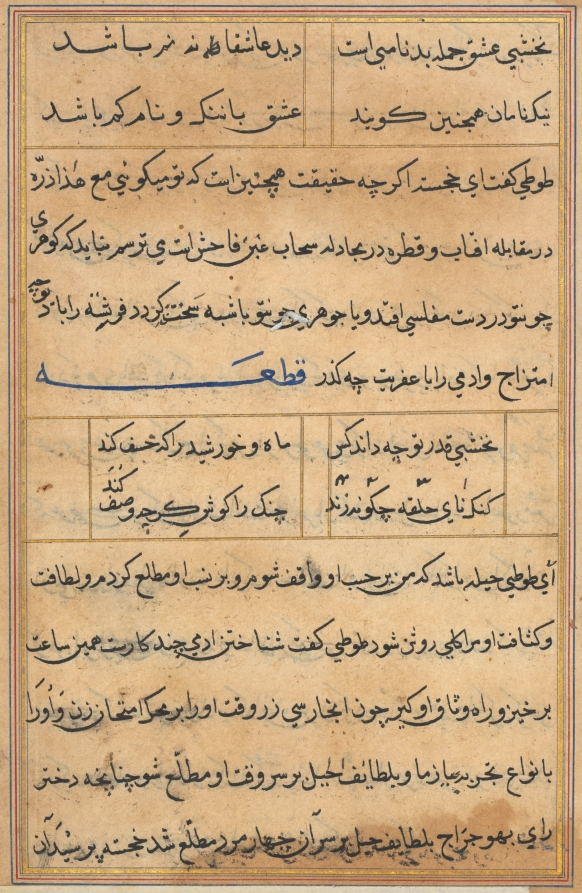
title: Page from Tales of a Parrot (Tuti-nama): text page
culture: Mughal India, court of Akbar (reigned 1556–1605)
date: c. 1560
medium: gum tempera, ink, and gold on paper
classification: Painting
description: The text of this manuscript is written in the Persian language using a clear form of the Arabic script called naskh. On this page the parrot is feigning concern that Khujasta's lover might not be as highborn as he claims to be. The prose is interrupted with lines of verse written in the gold-outlined boxes and introduced in blue with the word qat'e, meaning cut, as though the verse is cutting into the story.